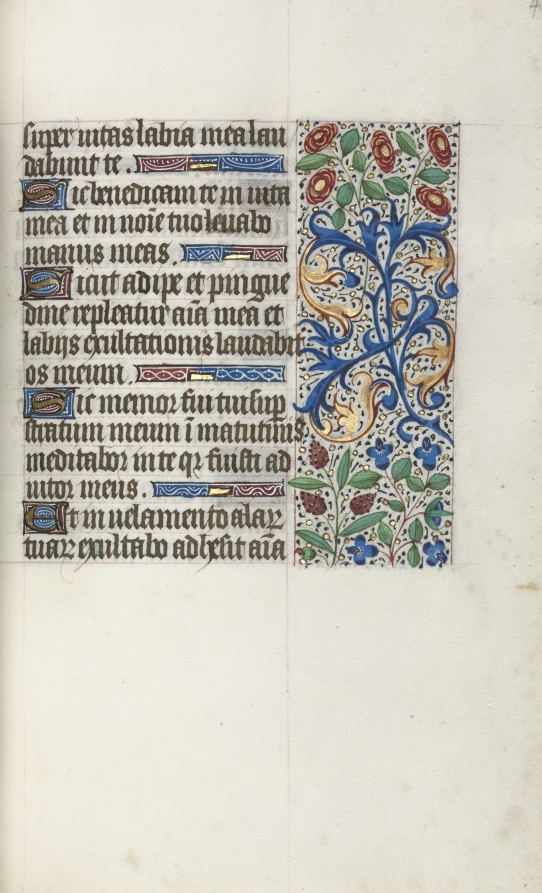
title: Book of Hours (Use of Rouen): fol. 40r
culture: France, Rouen, 15th century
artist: Master of the Geneva Latini (French, active Rouen, 1460–80)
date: c. 1470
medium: ink, tempera, and gold on vellum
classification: Bound Volume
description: In the late 1400s and early 1500s Rouen was an established and important center of book production. The city’s cathedral had a wealthy chapter that spent large sums of money to commission books and to maintain its extensive library. The stationers and booksellers would have likely been concentrated in or near the cathedral precinct. This artist, named after a manuscript now in Geneva, was Rouen’s principal illuminator during the second half of the 1400s.